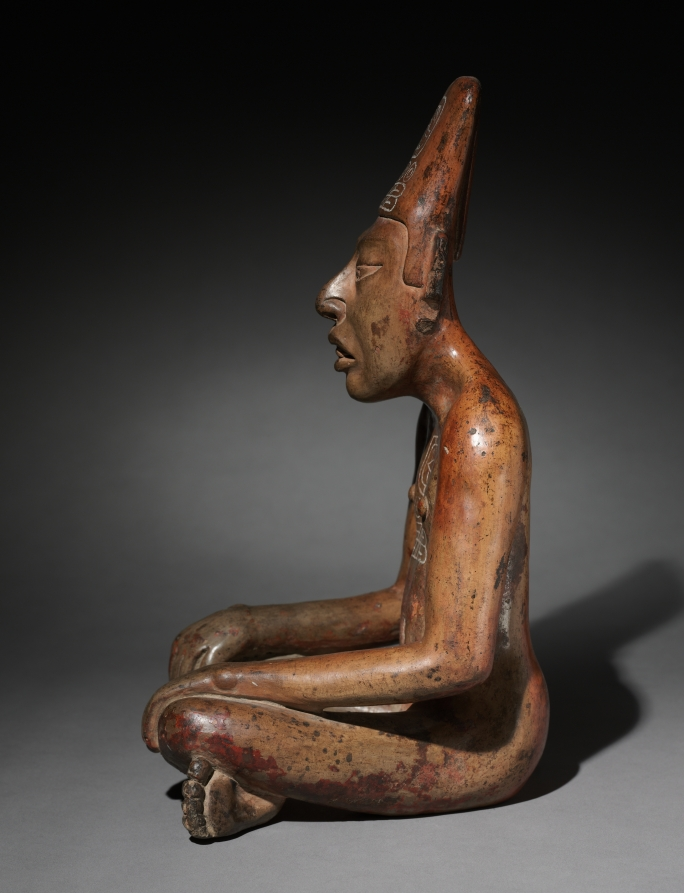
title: Seated Figure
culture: Mexico, Oaxaca, Zapotec style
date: 300 BCE–700 CE (thermoluminescence date, 285 BCE–515 CE)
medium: ceramic, slip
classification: Sculpture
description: The most famous Zapotec tomb ceramics are elaborate figural urns flanked by smaller, simpler companions similar to this one. Like other companions, this example probably belonged to a set of nearly identical figures; two others remain in Mexico. The identity of ceramic tomb figures-whether elite humans, royal ancestors, or deities-is still debated. The Zapotec developed one of Mesoamerica’s earliest writing systems, evidenced by the hieroglyphs on the headdress and chest. These are the names of calendar days, "13 Water" and "13 Flint Knife," respectively. Because people were named after the day on which they were born, one hieroglyph may identify the figure.